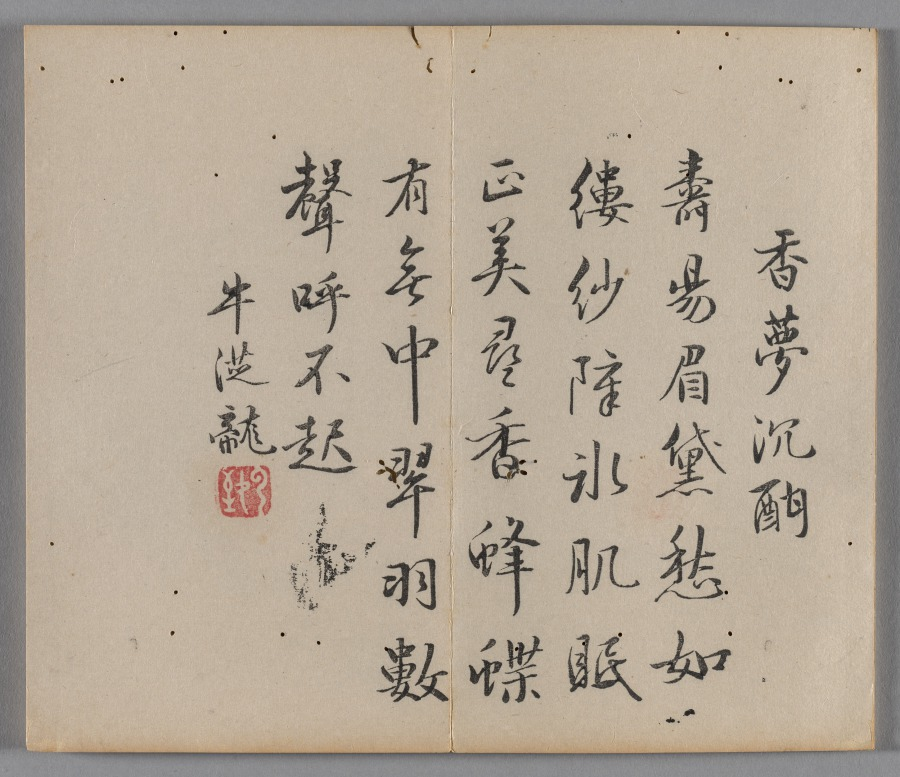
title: Ten Bamboo Studio Painting and Calligraphy Handbook (Shizhuzhai shuhua pu): Plum Blossoms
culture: China, Qing dynasty (1644-1911)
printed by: Hu Zhengyan (Chinese, c. 1584–1674)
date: 1633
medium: Woodblock-printed book; ink and colors on paper; first edition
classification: Print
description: Color printing reached a level of perfection in the early 1600s, as seen in this Ten Bamboo Studio Collection of Calligraphy and Painting and the Mustard Seed Garden Manual of Painting (printed 1679 and 1701). The painterly quality, precision in registering (aligning) the woodblocks, and harmonious colors made them the most successful color print editions in Chinese history. Both editions were printed and compiled in Nanjing, spread nationwide, and had a great impact on the arts in Japan and Korea.